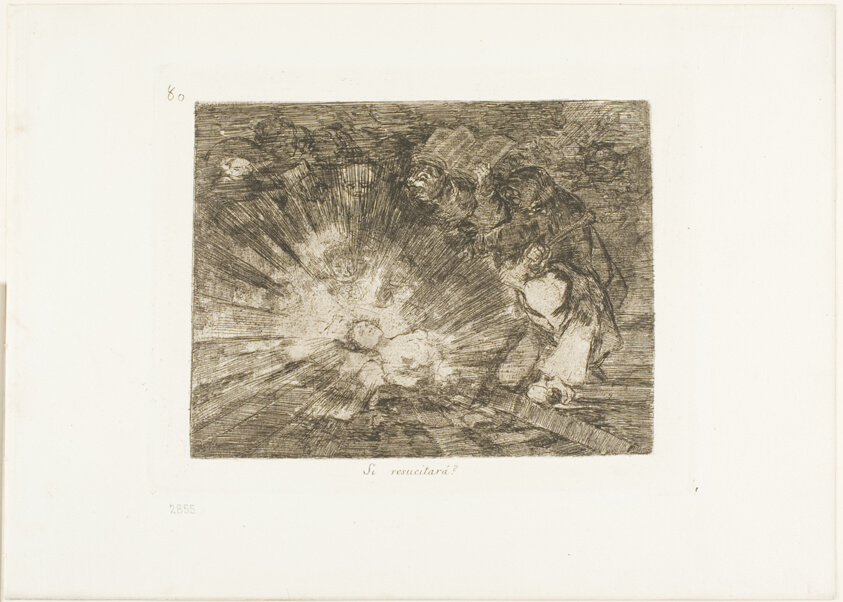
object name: Print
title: Will She Rise Again?, plate 80 from The Disasters of War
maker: Francisco José de Goya y Lucientes (Spanish, 1746-1828)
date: 1815/20, published 1863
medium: Etching and burnishing on ivory wove paper with gilt edges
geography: Spain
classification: etching; aquatint; print; prints and drawing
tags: war